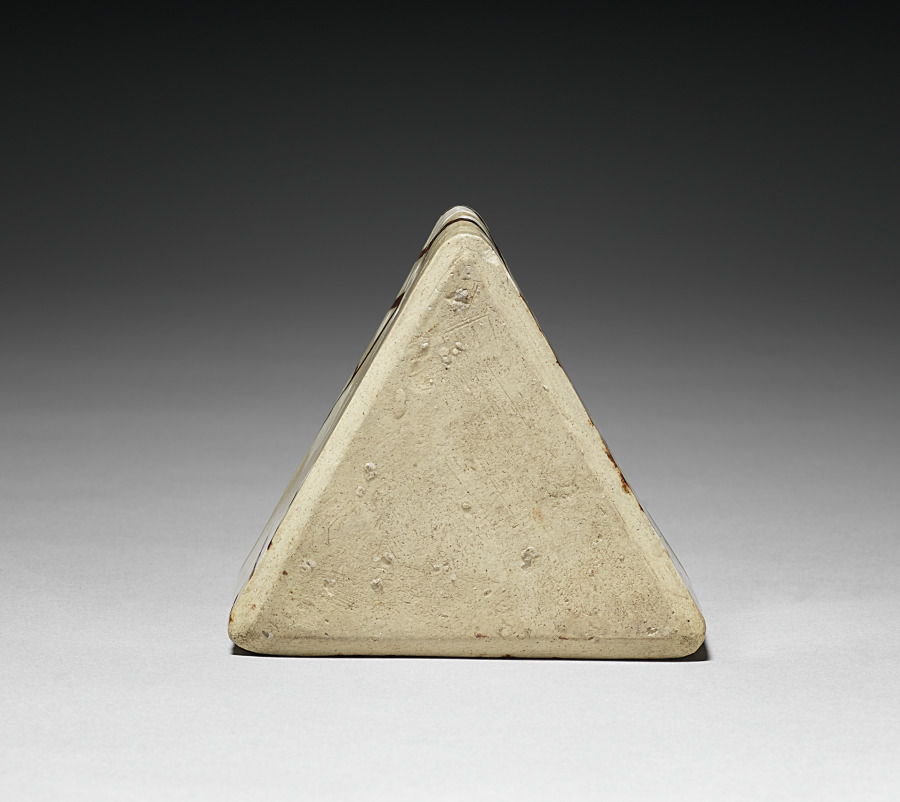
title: One of Five Serving Bowls (Mukozuke) with Prunus Design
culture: Japan, Edo period (1615–1868)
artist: school of Ogata Kenzan (Japanese, 1663–1743)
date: 1700s to mid-1800s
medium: Kyoto Ware: stoneware with underglaze iron oxide and slip decoration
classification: Ceramic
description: Note the rough, tan, clay bodies of these bowls with their deliberate irregularities. The design of branches was first painted in a black iron oxide, then the blossoms and buds in a white slip, followed by the application of a very thin transparent overglaze.